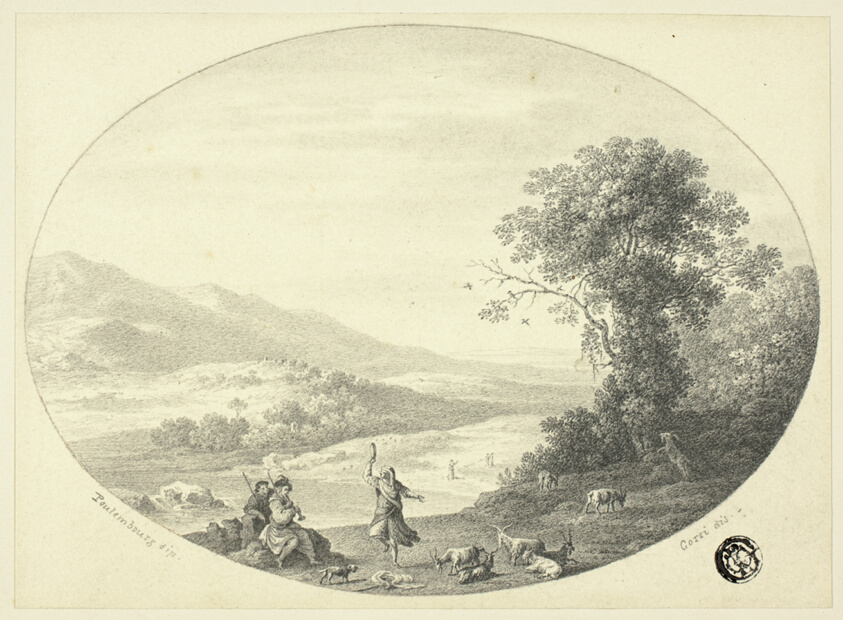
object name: Drawing and Watercolor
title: Italianate Landscape with Dancer, Musicians and Goats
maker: After Cornelis van Poelenburgh (Dutch, 1594/95-1667); or possibly Marcantonio Corsi (Italian, active 1750-1762)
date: c. 1750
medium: Graphite on ivory wove paper, laid down on off-white card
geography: Holland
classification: graphite; drawings (visual works); prints and drawing; paper